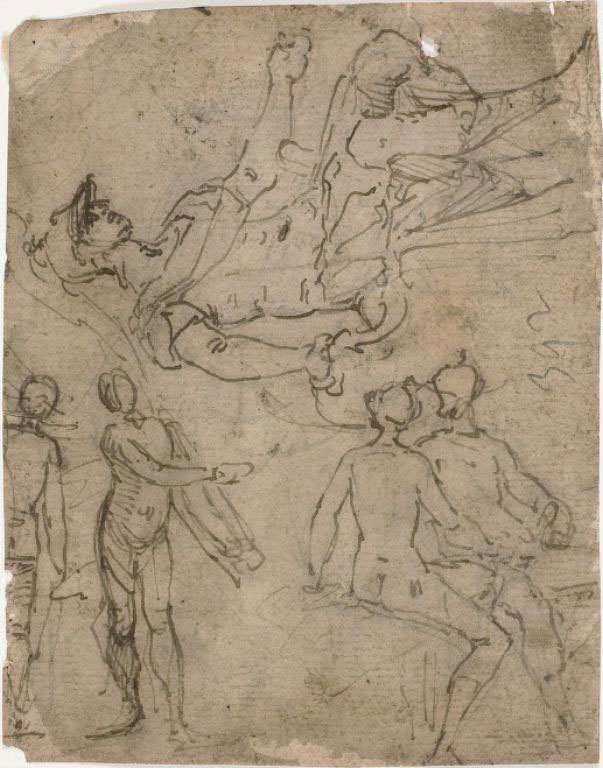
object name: Drawing and Watercolor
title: Sketches of Seated Warrior, Various Figures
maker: Bernardo Castello (Italian, 1557-1629)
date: 1585/95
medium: Pen and brown ink, on brown-tinted laid paper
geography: Italy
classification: pen and ink drawings; drawings (visual works); prints and drawing